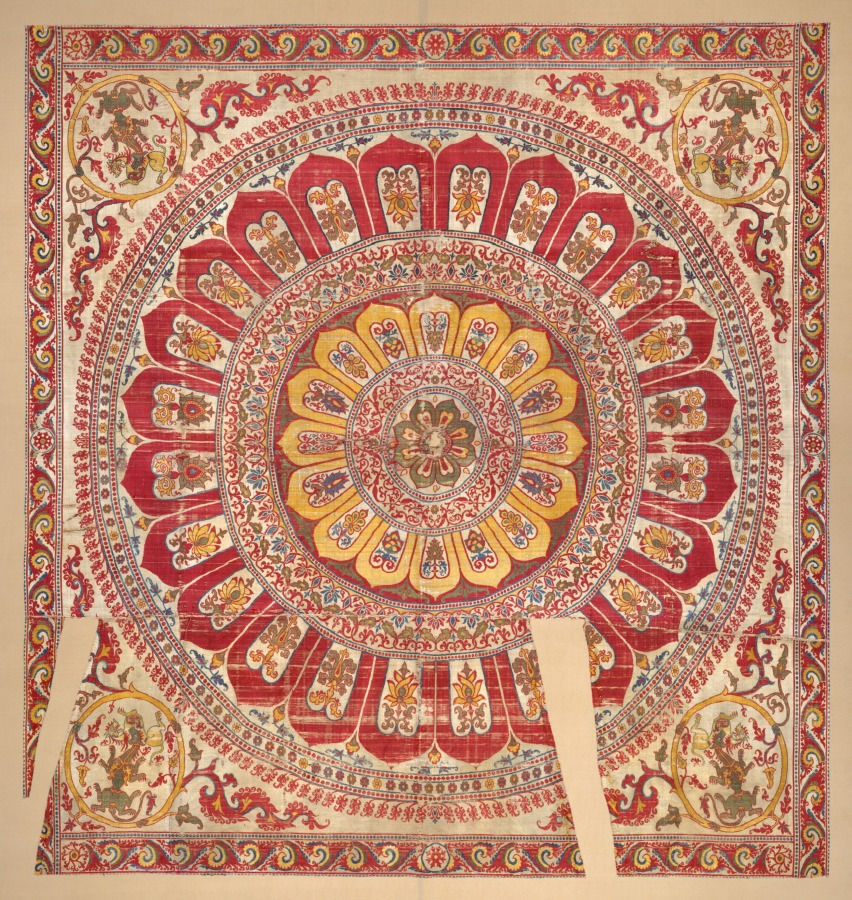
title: Lotus-blossom petal canopy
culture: Northern India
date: c. 1600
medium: silk: lampas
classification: Textile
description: The ceilings of sacred spaces throughout India were carved or painted with concentric circular lotus patterns; many also included textile canopies with the same designs. This exceptionally large example was woven in one complete section on a single loom. In India, the full-blown lotus flower bears solar connotations. It projects the radiance of a sacred or royal presence below. The motif of a dragon bearing down on a winged lion in each of the four corners indicates the designer’s recognition of a motif popular across Islamic Asia, from Turkey to Iran and Mughal India.